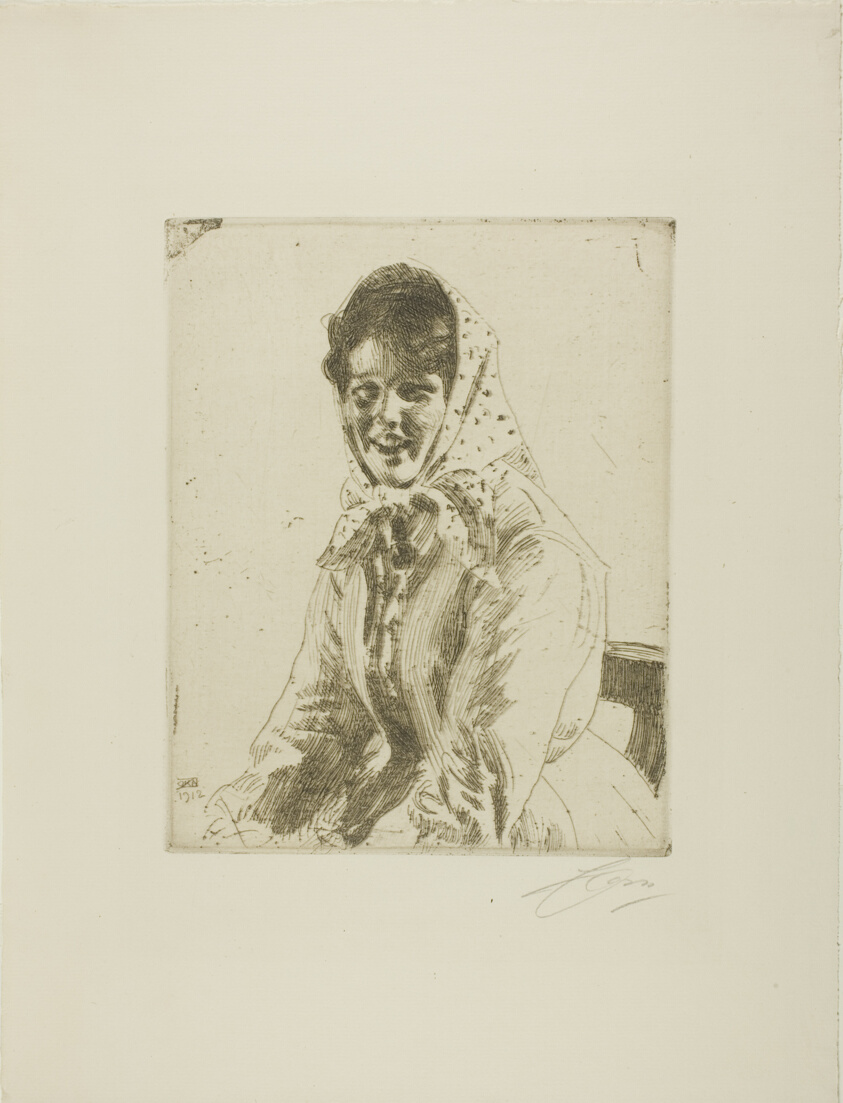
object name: Print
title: Skerikulla (A Skeri Girl)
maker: Anders Zorn (Swedish, 1860-1920)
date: 1912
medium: Etching on ivory laid paper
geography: Sweden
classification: etching; print; prints and drawing